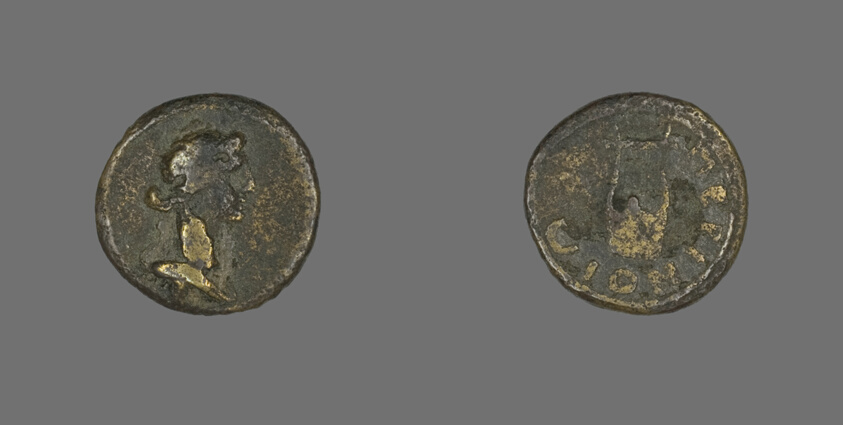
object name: Coin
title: Coin Depicting Bust of Dionysos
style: greek, ancient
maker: Greek, minted in Perinthos, Thrace (now Turkey)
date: 3rd century CE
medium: Bronze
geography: Ancient Greece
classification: coin; ancient art